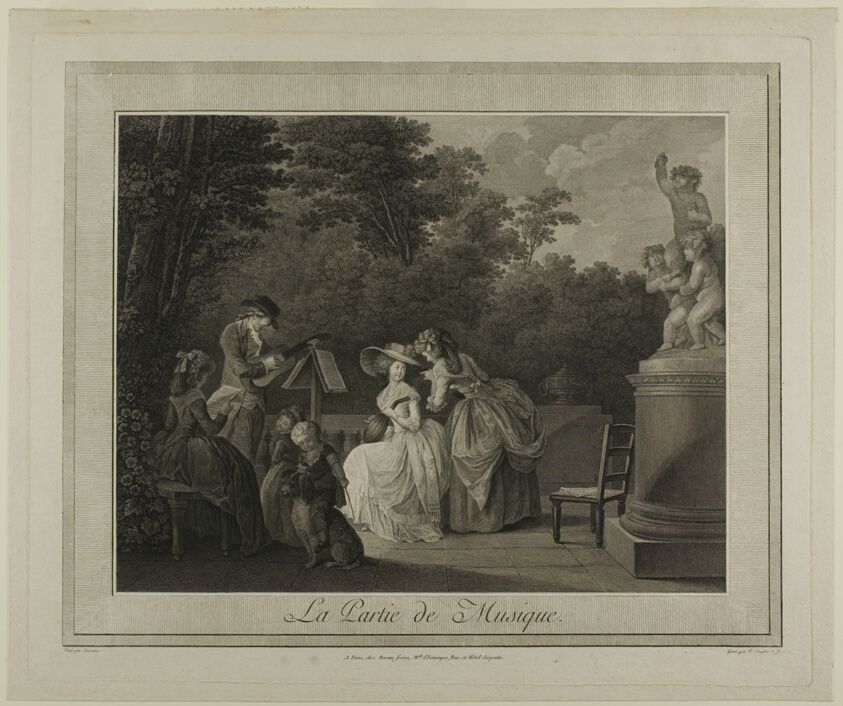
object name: Print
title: La Partie de Musique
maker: Vincent-Marie Langlois (French, born 1756); after Nicolas Lavreince (French, 1737-1807)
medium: Engraving in black on paper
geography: France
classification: engraving; print; prints and drawing